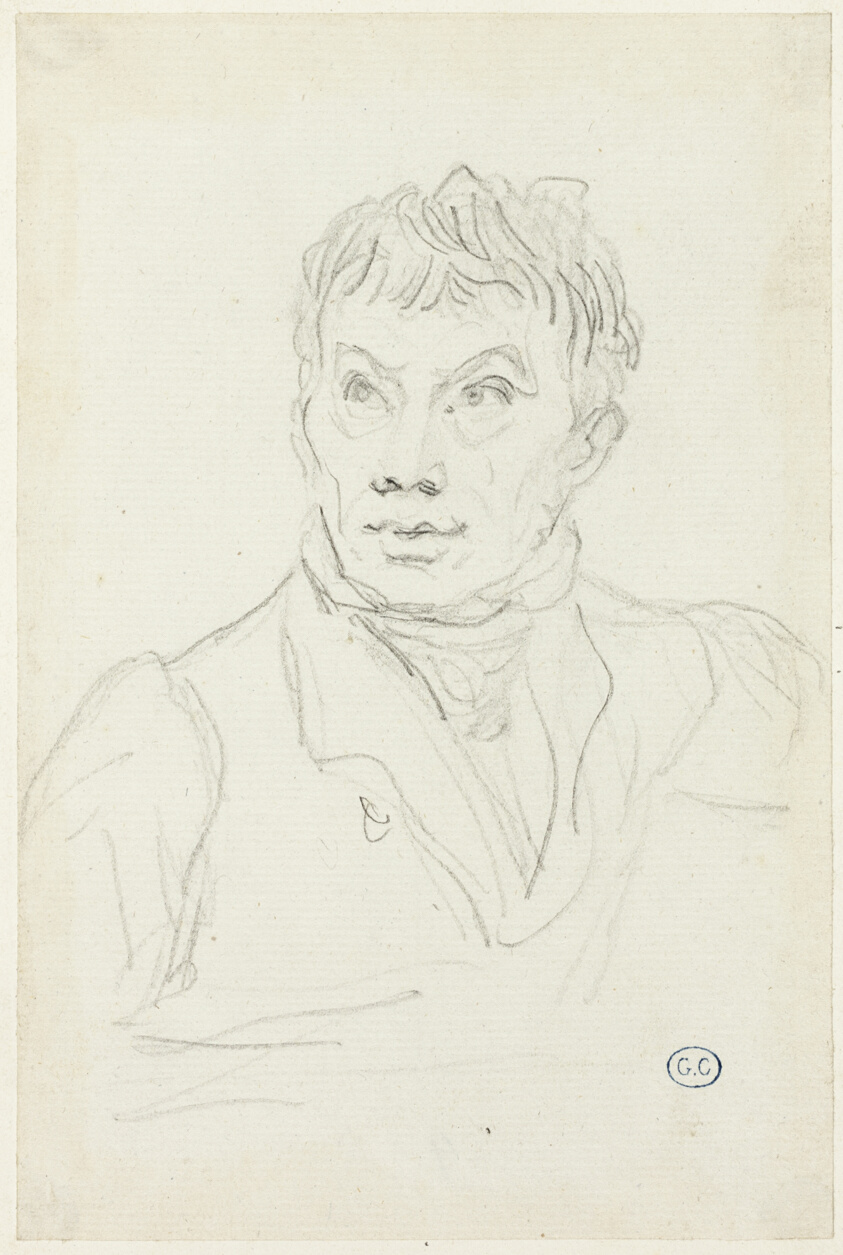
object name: Drawing and Watercolor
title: Alexandre Lenoir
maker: Jacques-Louis David; French, 1748-1825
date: c. 1810 or c. 1817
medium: Graphite, on off-white laid paper, edge mounted on cream wove paper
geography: France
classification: drawings (visual works); prints and drawing